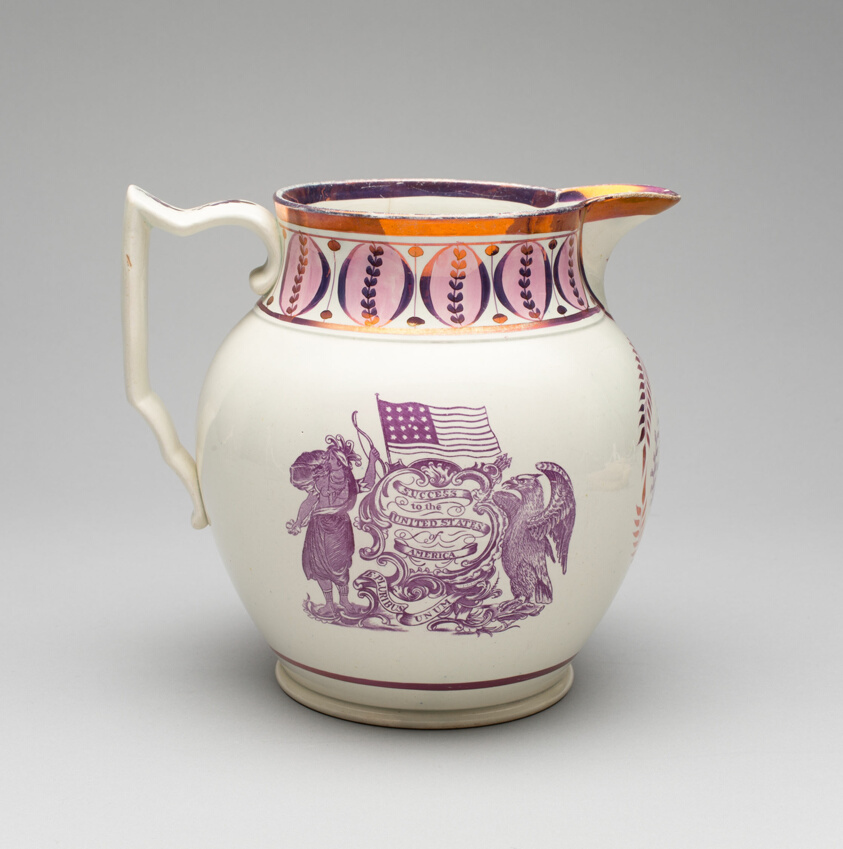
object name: Decorative Arts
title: Jug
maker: English for the American market; Staffordshire, England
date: c. 1800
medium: Earthenware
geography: Staffordshire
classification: vessel; earthenware; american decorative arts; ceramics; decorative arts